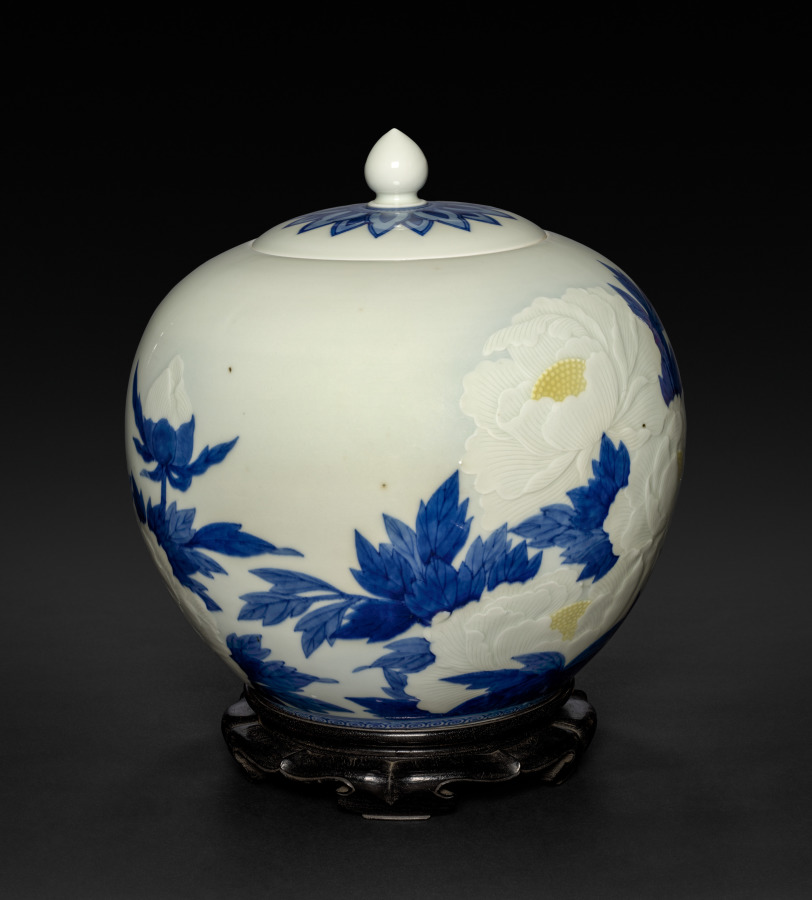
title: Lidded Jar with Peonies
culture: Japan, Meiji period (1868–1912)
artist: Seifū Yohei III (Japanese, 1851–1914)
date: 1897–1912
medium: Porcelain with molded and carved design and underglaze color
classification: Ceramic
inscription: 大日本清風造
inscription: 金聲玉振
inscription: 帝室技芸員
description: The petals of the large, white peonies on this jar were made by applying molded clay to the body and incising the clay with lines for definition. The flowers’ centers were then painted with yellow, along with the leaves in cobalt blue line and wash. A subtle blue gradation was also added all around the flowers using a masking method. The lid, with its treasured jewel-shaped finial, was also decorated with foliate motifs in underglaze cobalt blue. Finally, a transparent glaze was applied over the entire body of both the jar and lid. It is a special demonstration of Yohei III’s use of precision and control to create a completely balanced composition.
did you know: Seifū Yohei III drew inspiration from Qing dynasty Chinese wares but experimented widely with new glazing techniques.